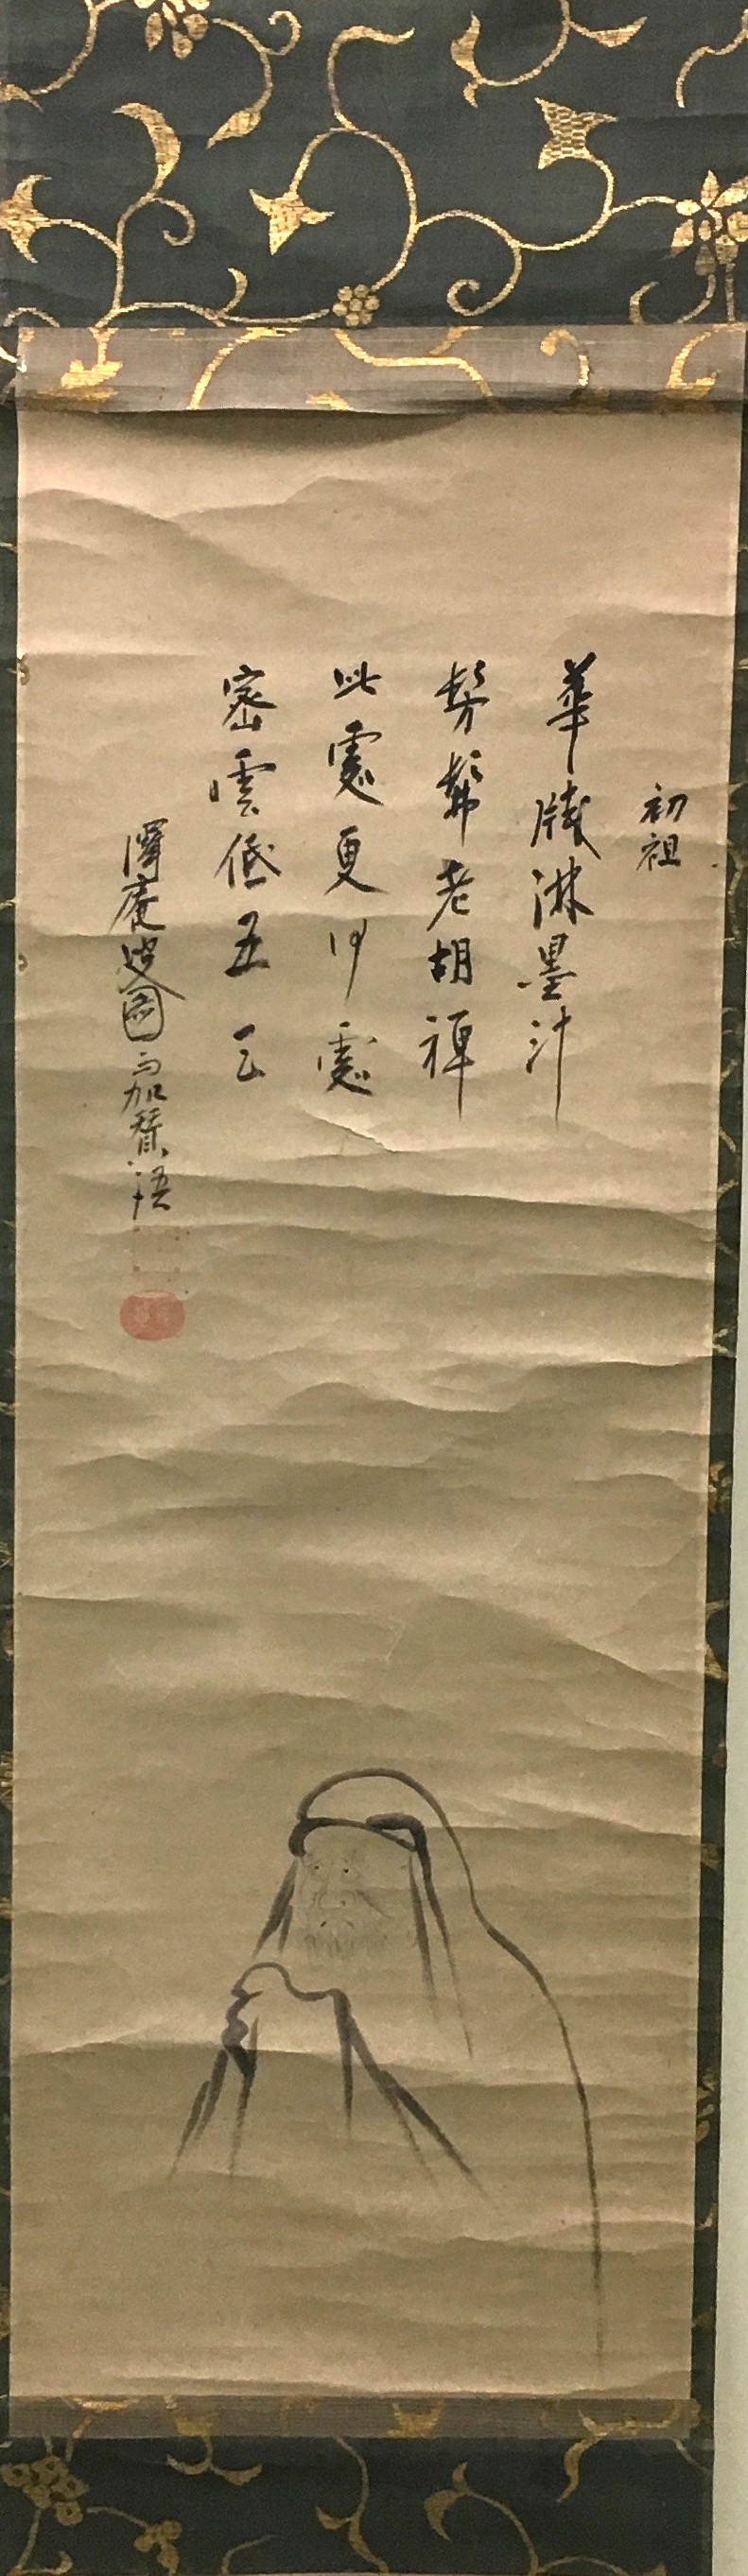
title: Portrait of Daruma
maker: Takuan Boô (Japanese, 1573-1645)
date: 16th century–17th century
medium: Hanging scroll, ink on paper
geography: Japan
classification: painting; asian art